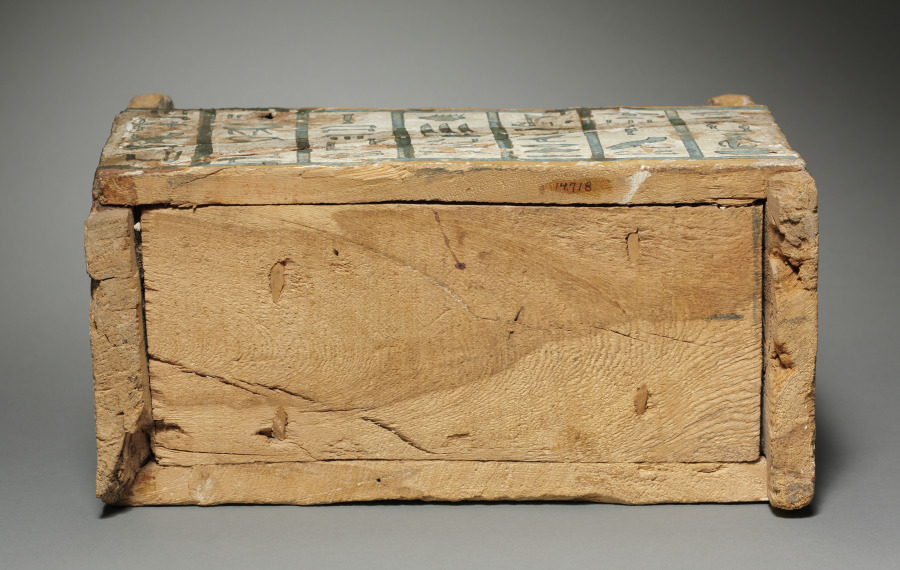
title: Covered Box for Shawabtys of Ditamenpaankh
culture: Egypt, Late period (715–332 BCE), Dynasty 25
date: 715–656 BCE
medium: painted wood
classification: Funerary Equipment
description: High demand for shawabtys in the Late Period, a time when as many as 400 or more shawabtys were placed in the tomb with the deceased, gave rise to a specialized container for storing them: the shawabty box. This example is inscribed for the lady of the house, Ditamenpaankh, and was probably one of a pair originally made for her. The single-masted boat on the box’s lid is perhaps an allusion to the pilgrimage of the deceased to the holy city of Abydos, the cult city of Osiris, king of the dead. The shawabtys inside are crude, mass-produced examples cast in an open mold. Made of terracotta, their blue paint imitates more costly shawabtys made of faience. As for the shawabty spell, it has been removed from its traditional location on the shawabty’s front and relocated onto the sides of box, where it needed only to be written once, thus expediting production.